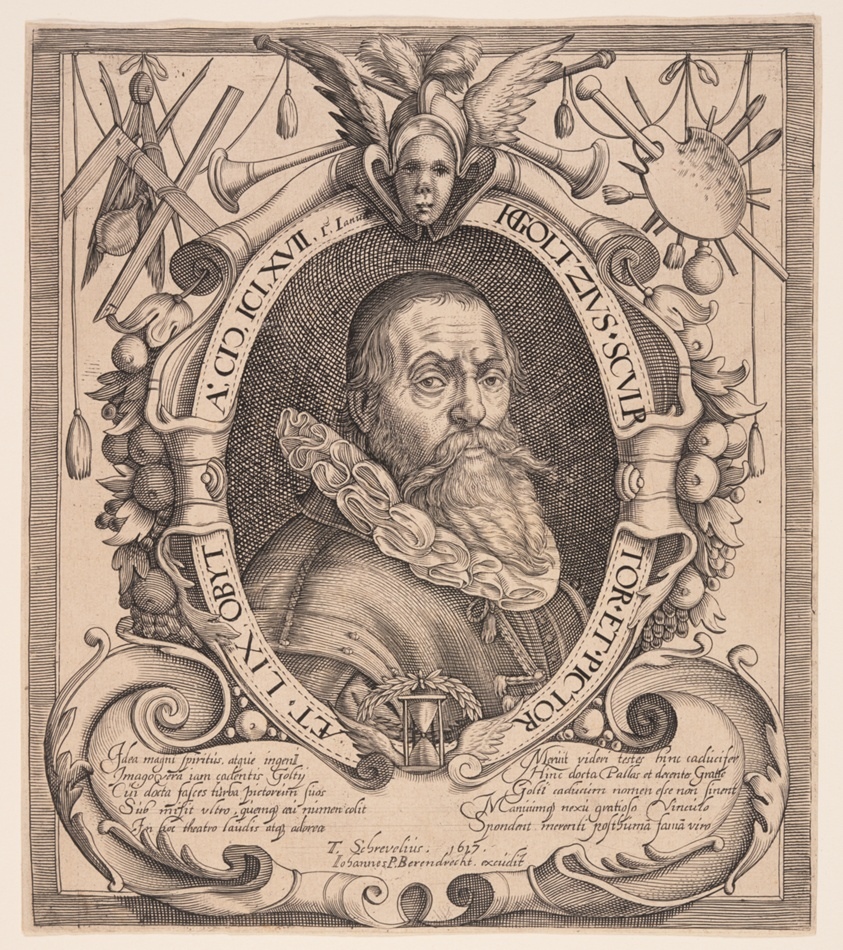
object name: Print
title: Hendrick Goltzius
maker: Unknown engraver; after Jacob Matham (Dutch, 1571-1631); published by Johannes Pietersz. Beerendrecht (Dutch, active 1614-1645)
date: 1617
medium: Engraving on laid paper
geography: Netherlands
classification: print; engraving; paper; prints and drawing